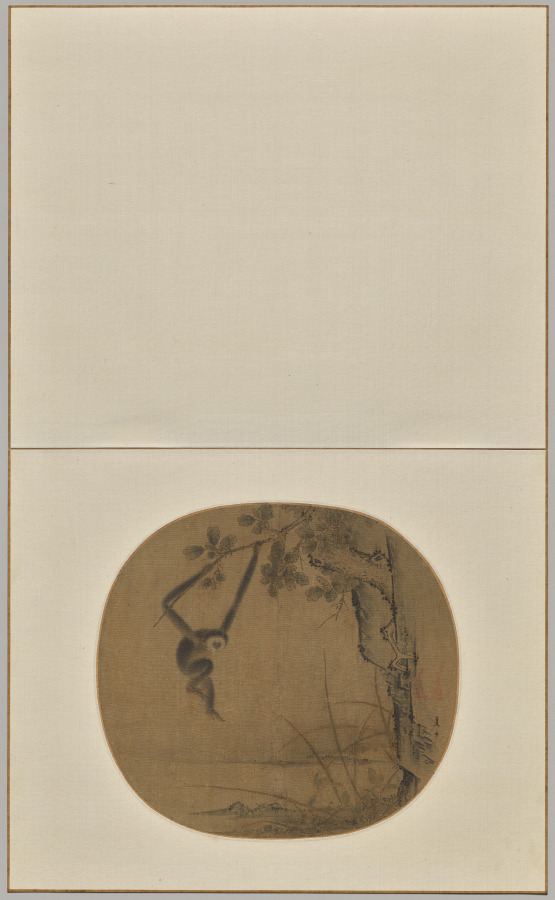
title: Swinging Gibbon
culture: China, Southern Song dynasty (1127-1279)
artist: attributed to Xia Gui (Chinese, active c. 1209–c. 1243)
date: late 1100s–early 1200s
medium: Album leaf; ink and color on silk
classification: Painting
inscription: Artist's signature: Hsia ? .